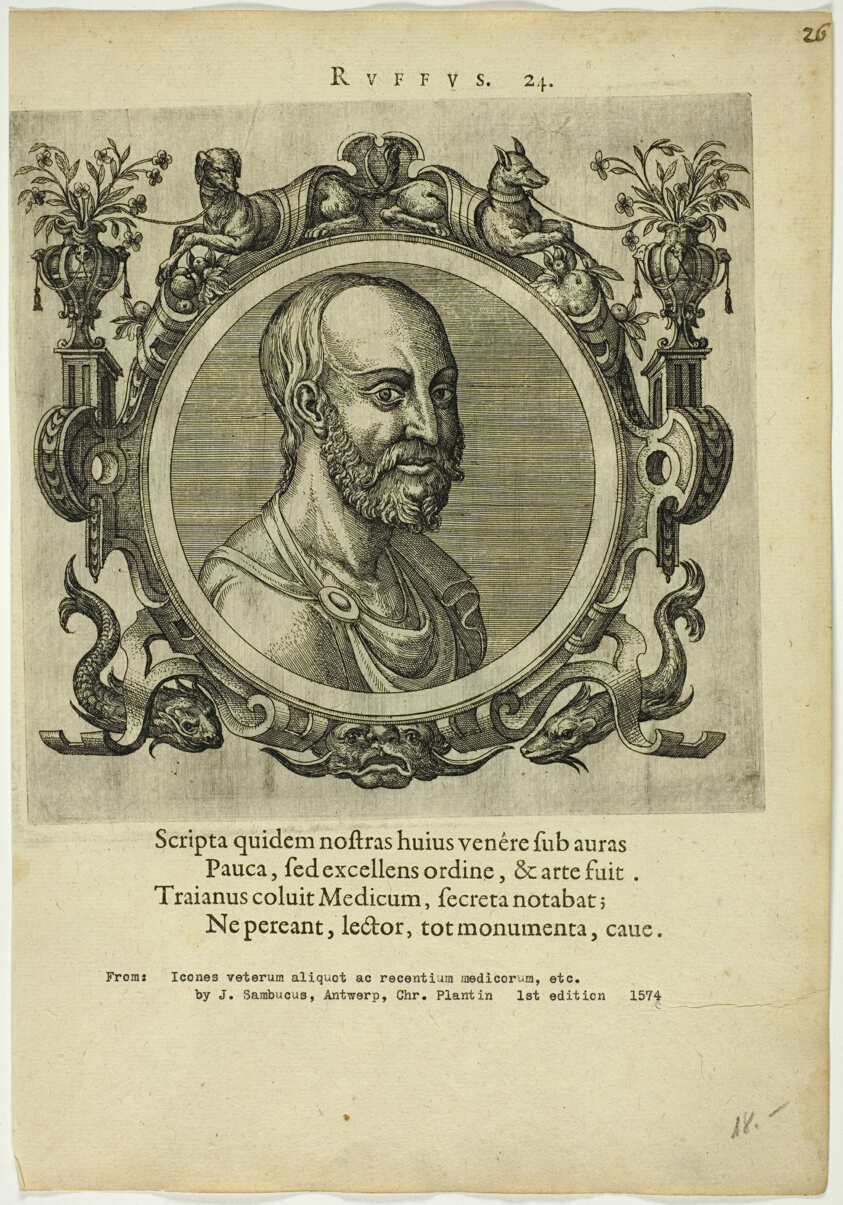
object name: Print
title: Portrait of Ruffus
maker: Unknown Artist (Flemish); written by Johannes Sambucus (Flemish, 1531-1584)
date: published 1574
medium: Etching, with engraving, on cream laid paper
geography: Flanders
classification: etching; print; prints and drawing